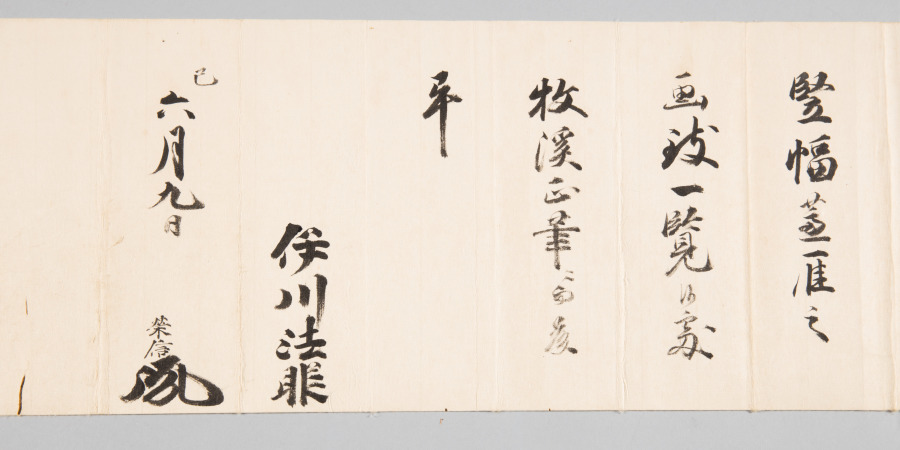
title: Reeds and Geese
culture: Japan, Kamakura period (1185–1333)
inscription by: Yishan Yining [Issan Ichinei] (Chinese, 1247–1317)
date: 1314–17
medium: hanging scroll; ink on paper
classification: Painting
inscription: signed: Issan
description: Reeds and geese has been a common pairing in Chinese literary and visual culture for many centuries. This painting presents the contribution of a Japanese amateur painter, almost certainly a Zen Buddhist monk, to Japan’s fledgling efforts to add the theme to its own cultural vocabulary in the early 1300s. As was customary at the time in Japan, the painter did not sign or seal his work; the inscription, a poem added to the painting by the eminent émigré monk Yishan Yining, along with his signature and seal, was of far greater cultural value. Today, the modestly sized painting has tremendous significance as one of the earliest surviving examples of Japanese ink paintings with reeds and geese.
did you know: Tokyo National Museum owns a copy of this painting made by Kano Gyokusen (1796–1864) when he was 14 years old.